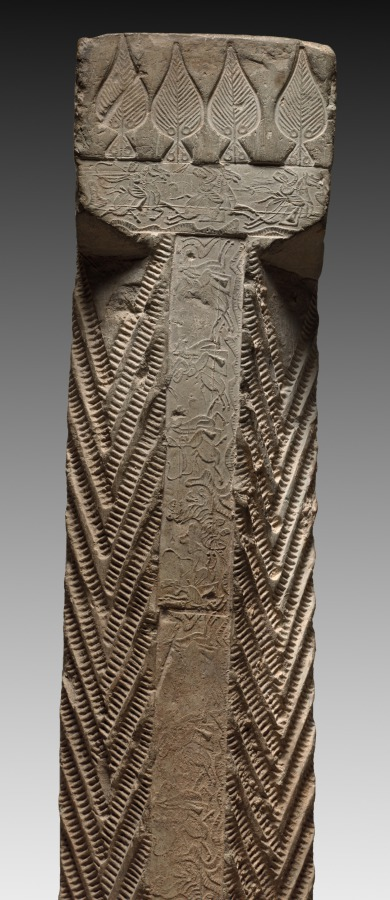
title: Hollow Tile: Column from Tomb-Chamber Doorway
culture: China, Han dynasty (202 BCE–220 CE)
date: 100–200 CE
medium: earthenware, die-stamped relief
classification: Ceramic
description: Striding tigers (top), racing horsemen (right column), and reverent officials (left column) are stamped into the surface of this underground portal to a tomb. The doorway preserves in stone the post-and-lintel structure, a basic element of Chinese wooden architecture. By the first century CE, a revolution in Chinese tomb construction and furnishing had taken place. Tombs lined with decorated bricks and tiles replace the earlier tombs constructed with only rammed-earth walls. Ceramic surrogates or models of stoves, houses, servants, and pets filled these more durable chambers, symbolically extending the creature comforts of this world into the world after death.